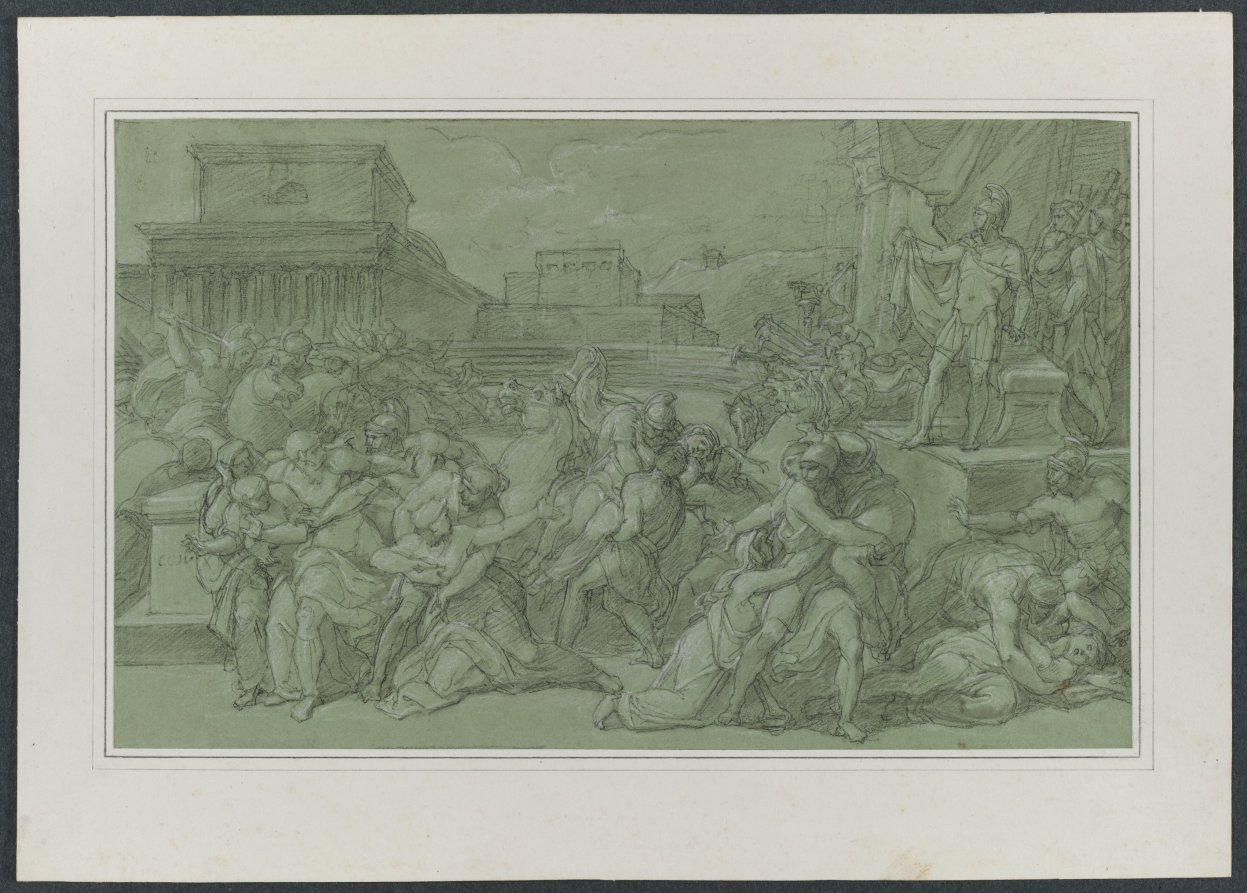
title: Rape of the Sabines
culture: Italy, 19th century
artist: Vincenzo Camuccini (Italian, 1771–1844)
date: c. 1820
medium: black chalk with white heightening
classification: Drawing